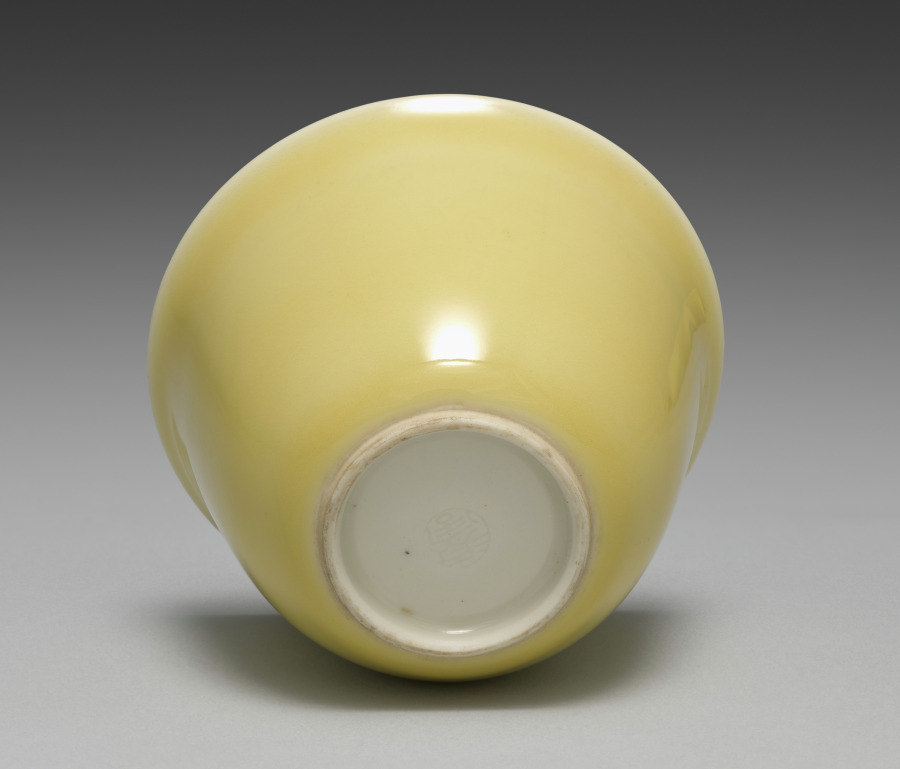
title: Cup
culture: Japan, Taishō period (1912–26) or Shōwa period (1926–89)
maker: Seifū Yohei IV (Japanese, 1872–1951)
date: 1914–46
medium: porcelain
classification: Ceramic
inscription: 清風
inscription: 清風造 【印】成山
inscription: 清風盧人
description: Like his father, Yohei IV also produced works with red or yellow monochrome glazes. His yellow-glazed works include this set of five drinking cups, a pair of sake pourers CMA 2022.216, and a sweets bowl molded into the shape of a chrysanthemum CMA 2022.218.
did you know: Seifū Yohei IV learned the ceramics industry from his father and painting from Tanomura Shosai.